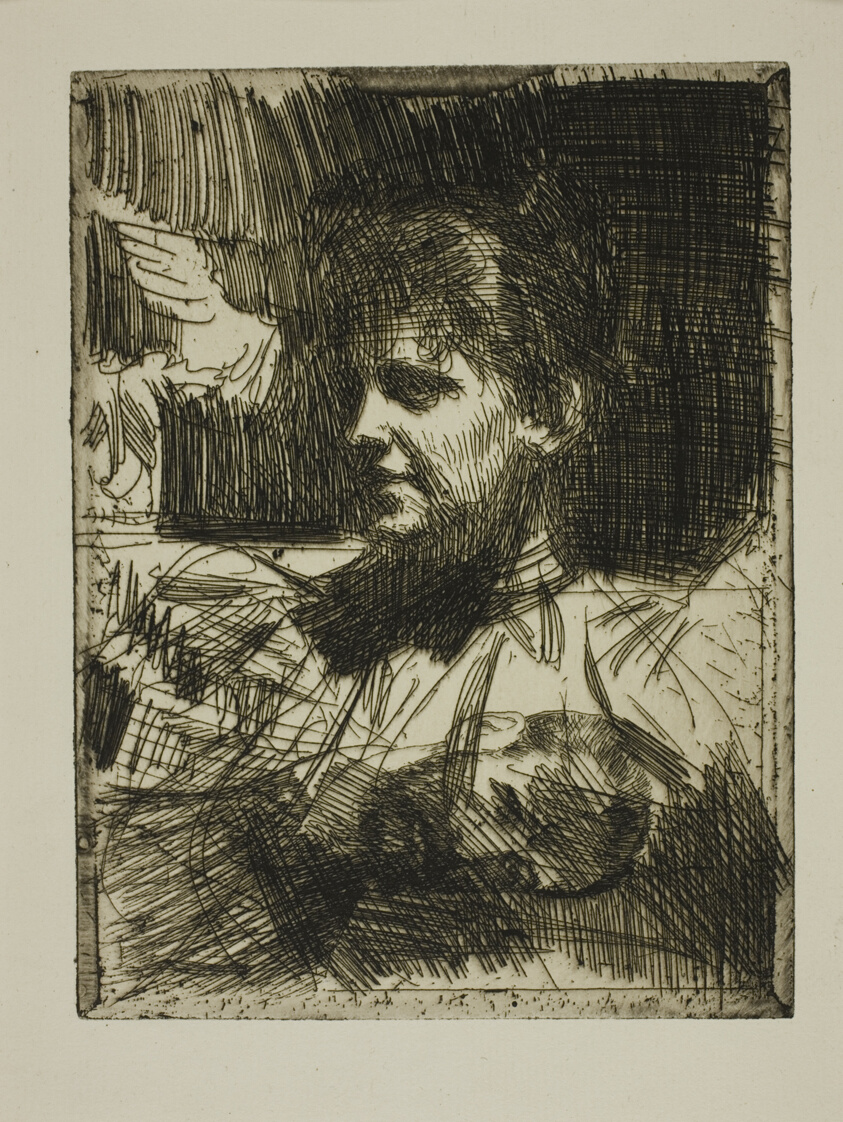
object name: Print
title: Gerda Hagborg I ("Pour plaire")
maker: Anders Zorn (Swedish, 1860-1920)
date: 1893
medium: Etching on ivory laid paper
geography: Sweden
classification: etching; print; prints and drawing